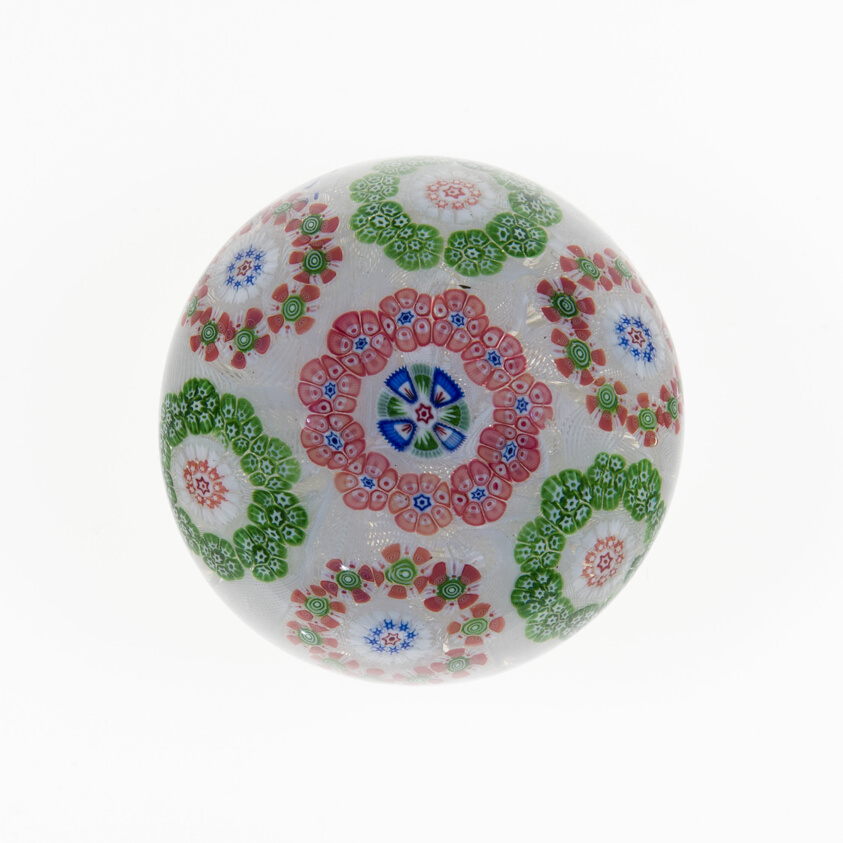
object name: Glass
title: Paperweight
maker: Baccarat Glassworks (Cristalleries de Baccarat); Lorraine, France, founded 1764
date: c. 1845–60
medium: Glass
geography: Baccarat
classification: paperweight; glass